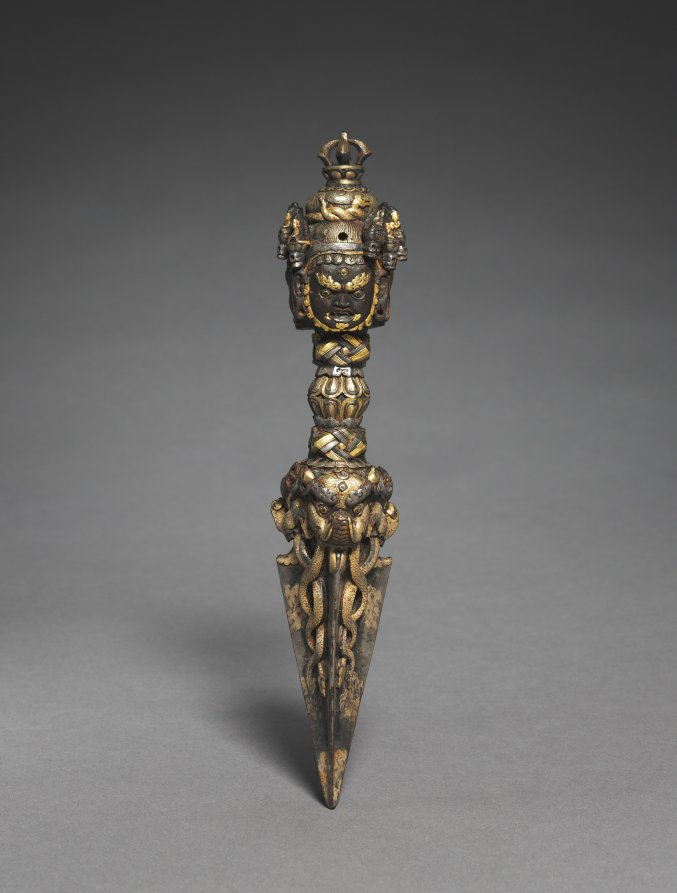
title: Phurbu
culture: Sino-Tibetan, Yongle period (1403–1424)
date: 1403–24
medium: metal alloys with gold and silver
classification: Metalwork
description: A purba is a dagger-like stake with three blades that helps tantric practitioners overcome their aversions to substances that are typically considered abhorrent, like pus and blood. Pierced with the purba, the unsavory substances are ritually transformed into wondrous substances, such as nectar. Crowning this purba are a half-vajra and three heads of the tantric enlightened being named Vajrakila, who presides over powers of transformation from wickedness to compassion. Each of his faces has been wrought of a different metal alloy in the imperial workshop of the Chinese emperor of the Ming dynasty. The luxurious quality of the endless knot motifs, the crocodile heads, and the snakes twisting down the center of each blade indicate Chinese imperial workmanship.